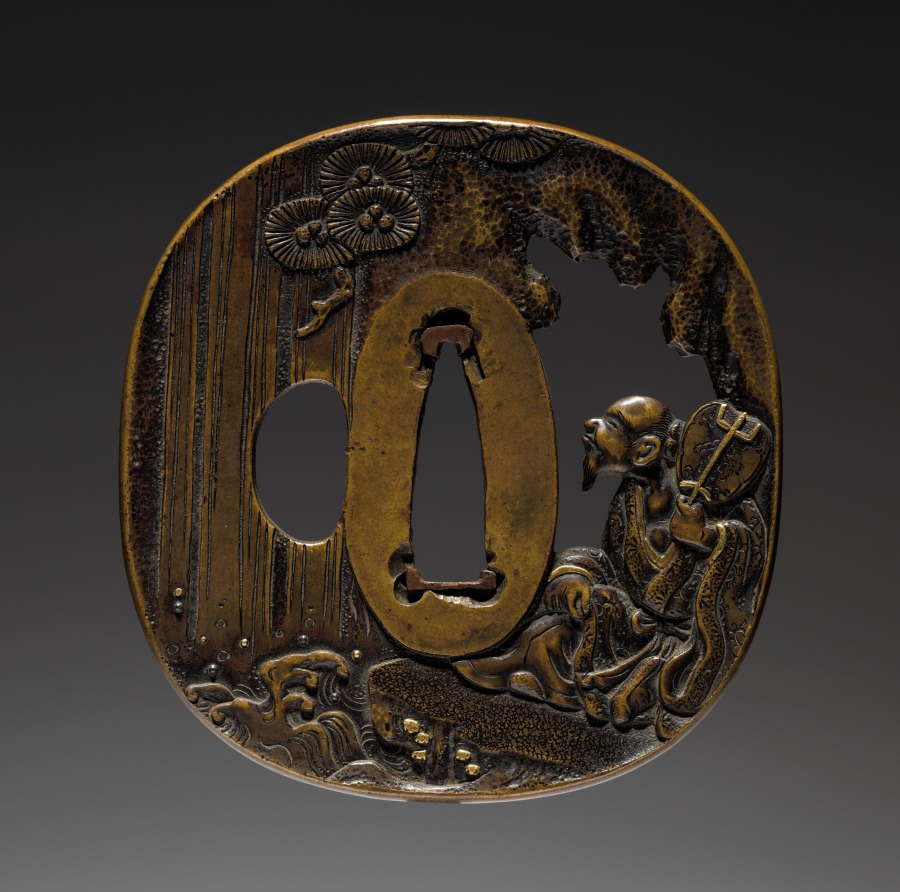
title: Sword Guard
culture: Japan, Edo period (1615–1868)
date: mid-1700s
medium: brass (possibly Mito type)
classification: Arms and Armor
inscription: signed "Tsuneshige."